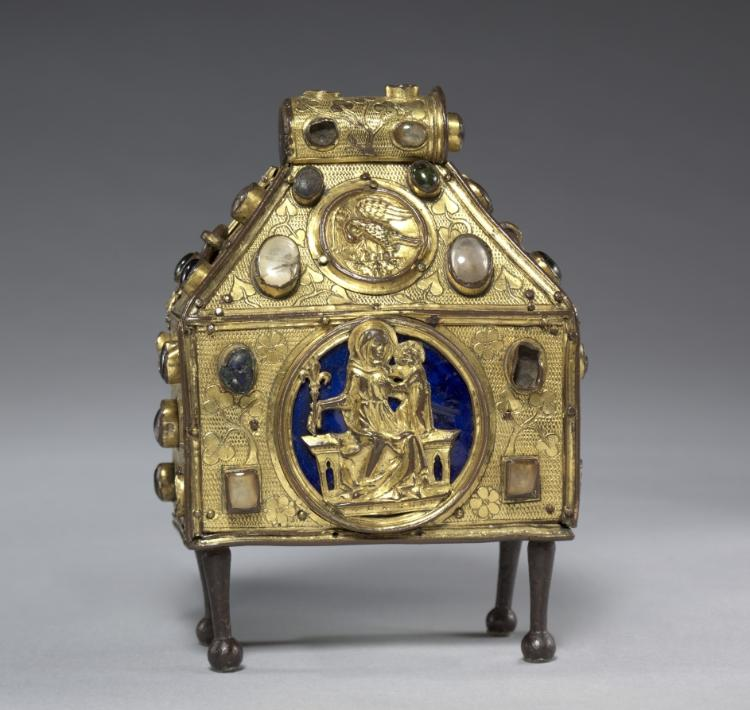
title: Reliquary in Purse Form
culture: Germany, Upper Rhine, Southern Swabia, Gothic period, 14th century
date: c. 1320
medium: copper, gilded and engraved; glass; rock crystal; precious stones; wood core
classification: Metalwork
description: This precious reliquary, adorned on its front and sides with colored glass, precious stones, and two medallions featuring the enthroned Virgin and Child and an eagle, forms part of a group of closely related objects manufactured in the Upper Rhine region shortly after 1300. The purse shape, with its peaked roof and cylindrical top, derives from much earlier Carolingian and Romanesque prototypes. The reliquary was originally suspended from the rings on both sides of the sloping roof.